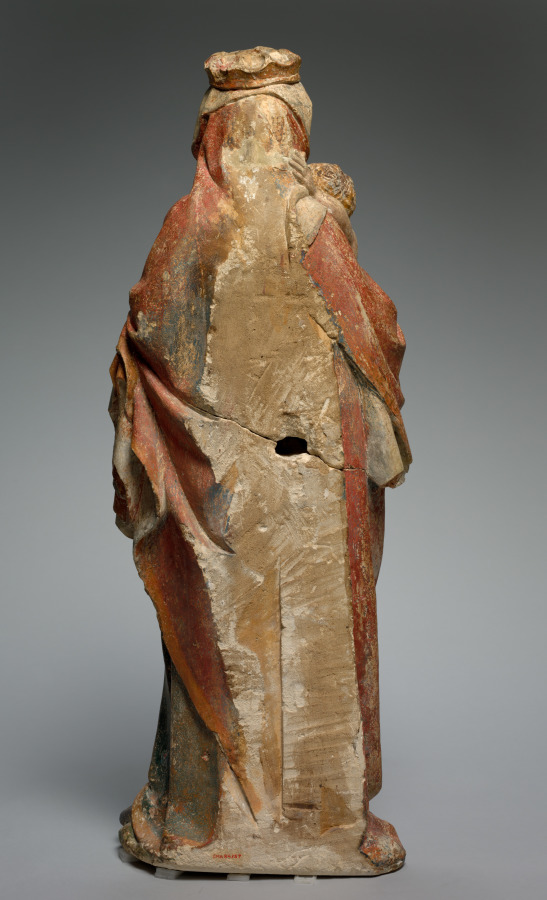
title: Virgin Nursing the Christ Child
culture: France, Île de France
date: c. 1370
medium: painted limestone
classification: Sculpture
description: This sculpture of the Virgin Mary nursing the Christ child subtly emphasizes the intimate relationship between mother and child and brings the Son of God in his human existence closer to the viewer. The emotional interaction is characteristic of sculpture since the mid-1300s, especially in the circles close to the court of the French kings in Paris and Emperor Charles IV (reigned 1346–78) in Prague. These novel stylistic tendencies were possibly a reaction to the fear and uncertainty incurred by the first great plague wave in 1348.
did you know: The back of this sculpture is unfinished since it would have originally been placed against a wall or pier.